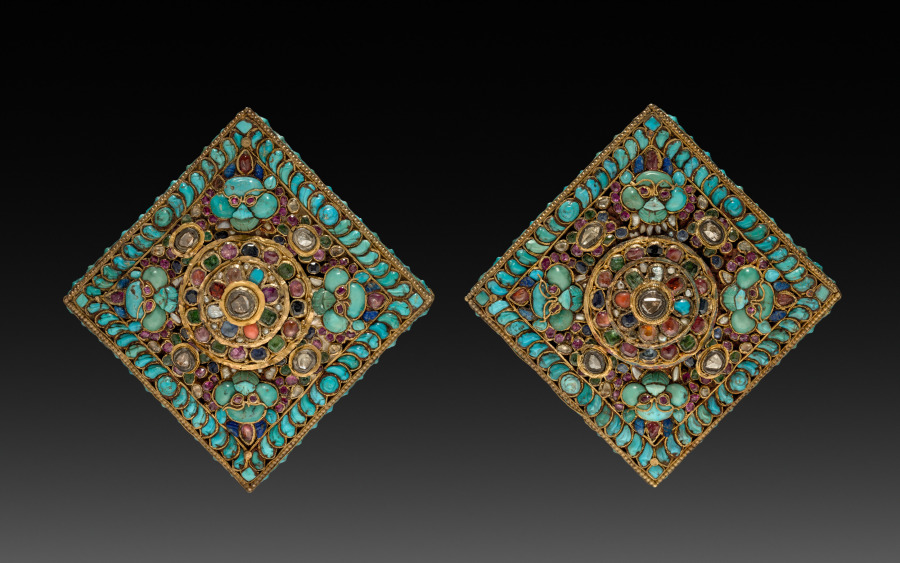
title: Charm Case Pair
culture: Tibet, 19th century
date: 1800s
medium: gold with jewels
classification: Jewelry